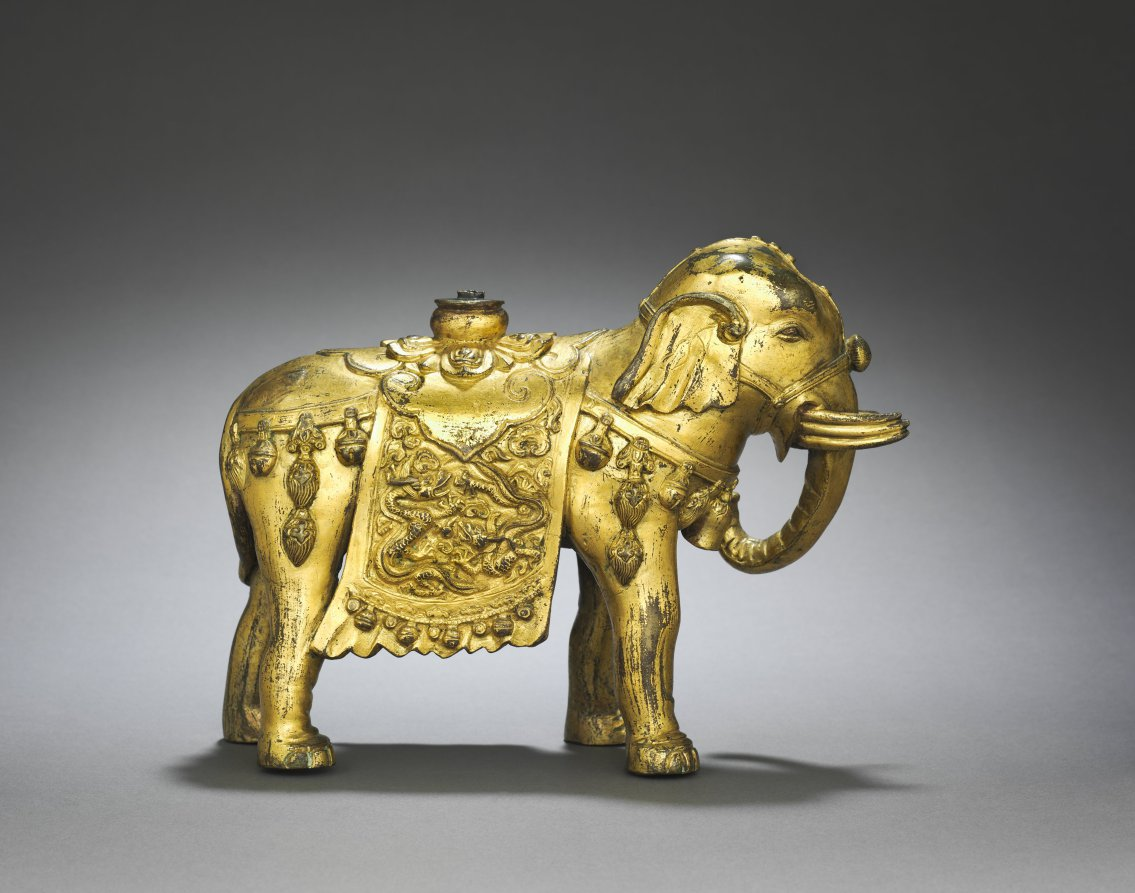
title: Caparisoned Elephant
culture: China, Liao dynasty (916-1125)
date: c. 1000s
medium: gilt bronze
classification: Sculpture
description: The six-tusked elephant holds the throne of Puxian (Samantabhadra), the Bodhisattva of Universal Virtue, who often appears with Wenshu (Manjusri), the Bodhisattva of Wisdom, on his lion-vehicle. This impressive gilt bronze statue is solidly cast, except for the hollow at the center of its belly. The richly ornate saddle cloth exhibits superb craftsmanship and vivid representations of dragons among clouds, echoing the worldly splendor of the Liao material culture.